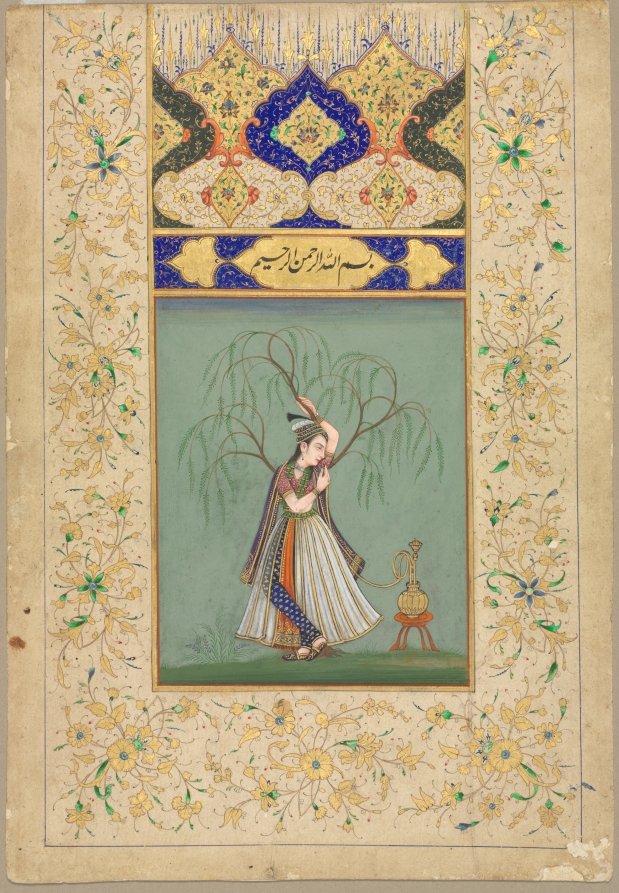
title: Princess Smoking a Hookah (as Salabhanjika)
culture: India, Mughal, Kulu influence, 18th century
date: 1700s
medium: Gum tempera and gold on paper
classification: Painting